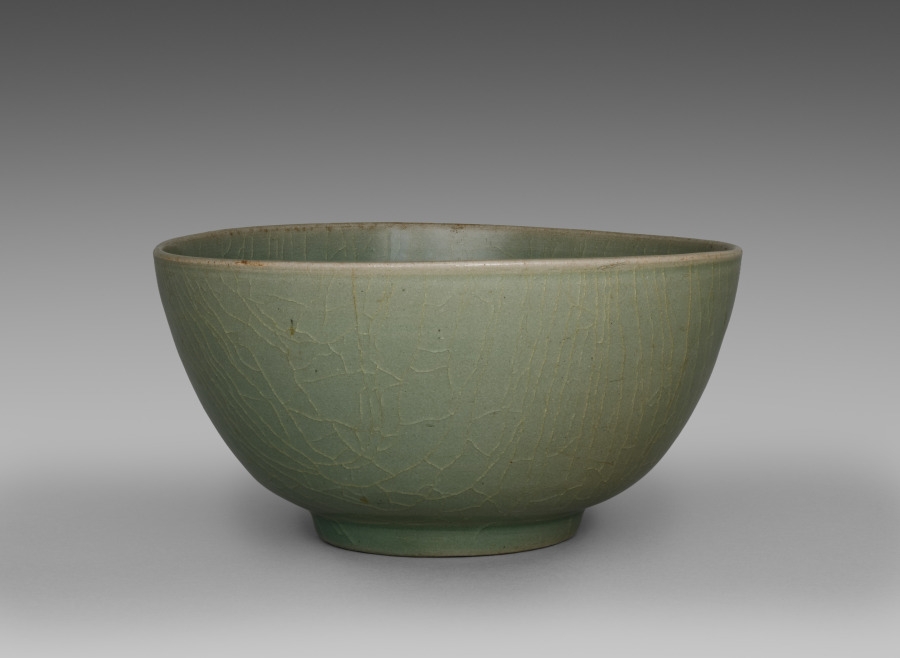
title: Celadon Bowl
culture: Korea, Goryeo dynasty (918–1392)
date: 1200s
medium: Celadon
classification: Ceramic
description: As early as the seventh century, the practice of drinking tea and wine became an important part of elite leisure culture in Korea. A wide bowl like this example was especially suitable for drinking powdered tea shaved from a compressed tea cake, the most commonly enjoyed type during the Goryeo period.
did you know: Crackling occurs when the glaze contracts more rapidly than the clay body during the firing process. In the context of celadon bowls, this phenomenon is not regarded as a flaw but rather as a highly valued aesthetic feature—one that evokes a sense of age.